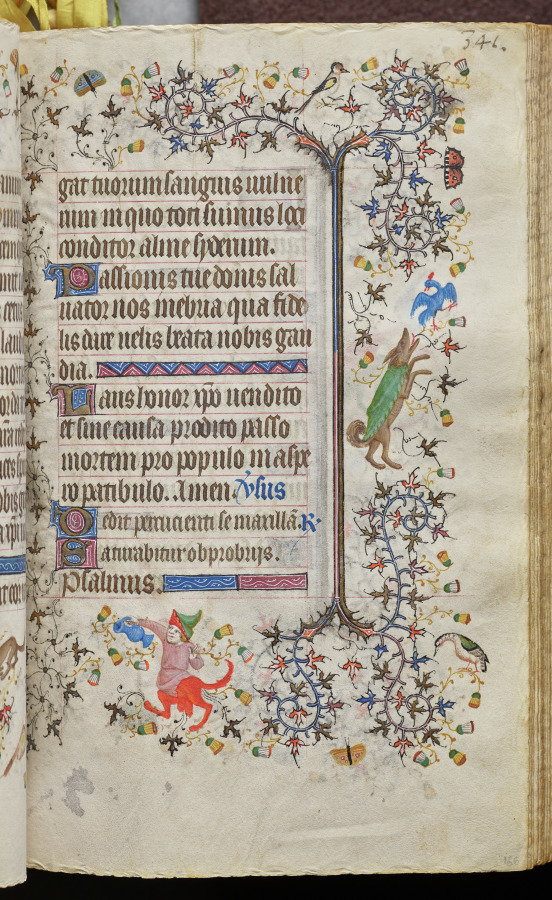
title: Hours of Charles the Noble, King of Navarre (1361-1425): fol. 166r, Text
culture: France, Paris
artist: Master of the Brussels Initials and Associates (French)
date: c. 1405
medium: ink, tempera, and gold on vellum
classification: Bound Volume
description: This precious volume was obviously highly prized by its owner, the French-born King of Navarre, who had his coat of arms painted on no less than twenty folios. Rather than directly commissioning this manuscript from a specific workshop, it seems that Charles the Noble acquired his book of hours -- perhaps ready-made for the luxury market -- while on a trip to Paris in 1404-05. A collaborative effort, six painting styles are evidenced within the pages of this codex, those of two Italians, two Frenchmen, and two Netherlanders. The painter who was responsible for the planning and decoration of the book, and who produced seventeen of the large miniatures, was a Bolognese artist known as the Master of the Brussels Initials. His principal assistant, responsible for most of the borders, was a Florentine who signed his name "Zecho" da Firenze on folio 208 verso.